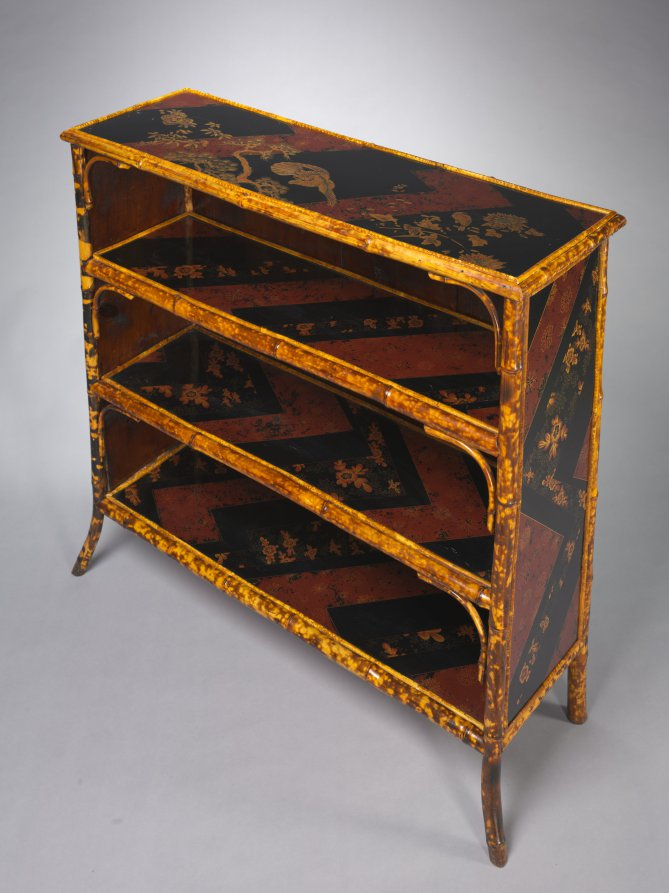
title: Bookcase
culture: France, 19th century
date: c. 1870–80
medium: bamboo with Japanese lacquer panels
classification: Wood